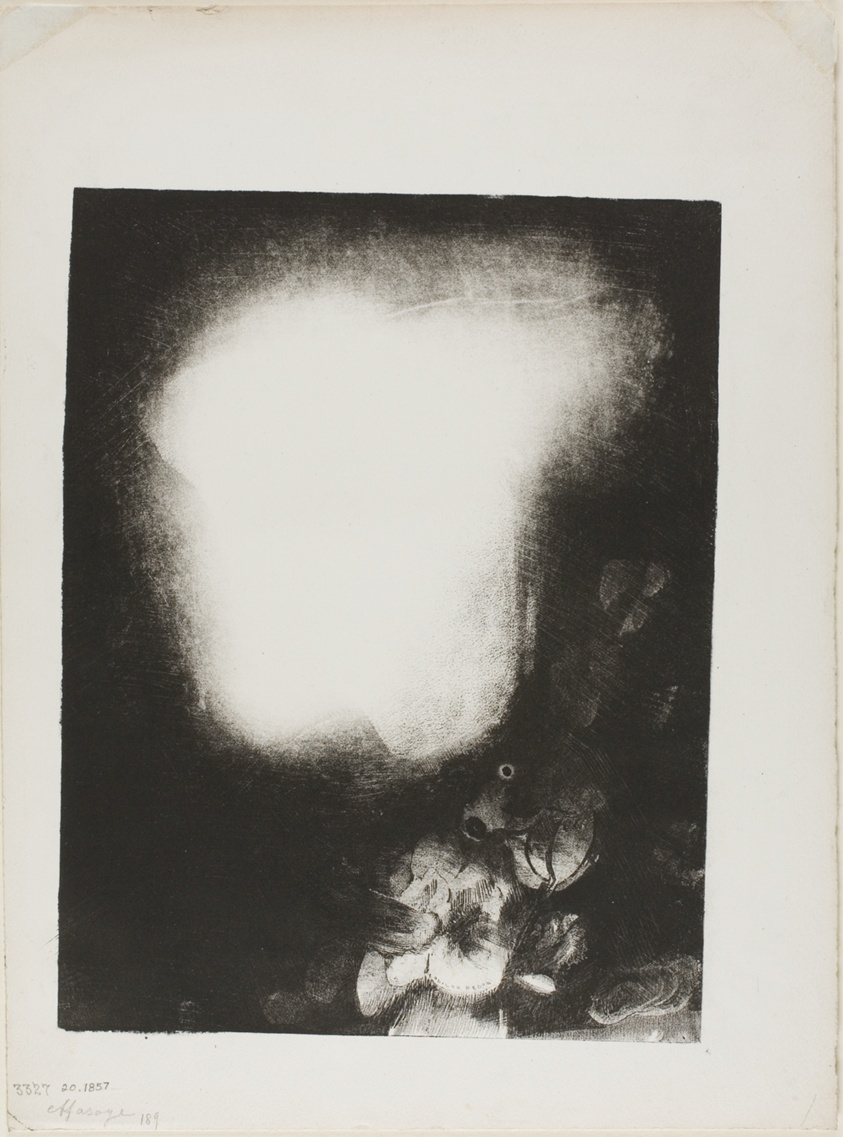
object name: Print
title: Head of Woman With Corsage of Flowers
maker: Odilon Redon (French, 1840-1916)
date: 1900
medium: Lithograph in black on heavy ivory wove paper, from effaced stone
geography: France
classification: lithograph; print; prints and drawing; paper